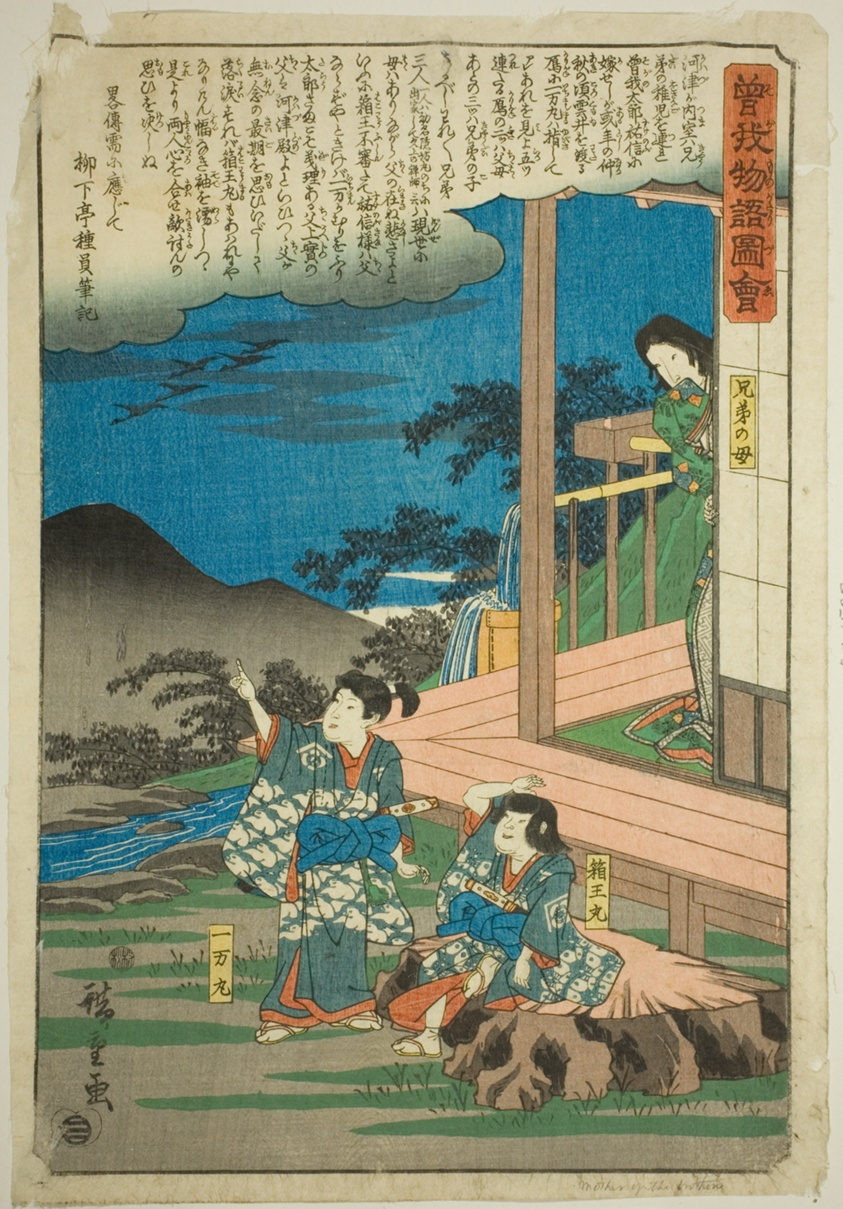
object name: Print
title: Ichimanmaru (Soga no Juro) and Hakoomaru (Soga no Goro) with their mother, from the series "Illustrated Tale of the Soga Brothers (Soga monogatari zue)"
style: Japanese (culture or style)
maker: Utagawa Hiroshige 歌川 広重; Japanese, 1797-1858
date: c. 1843/47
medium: Color woodblock print; oban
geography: Japan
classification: woodblock print; print; asian art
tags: mothers, parents